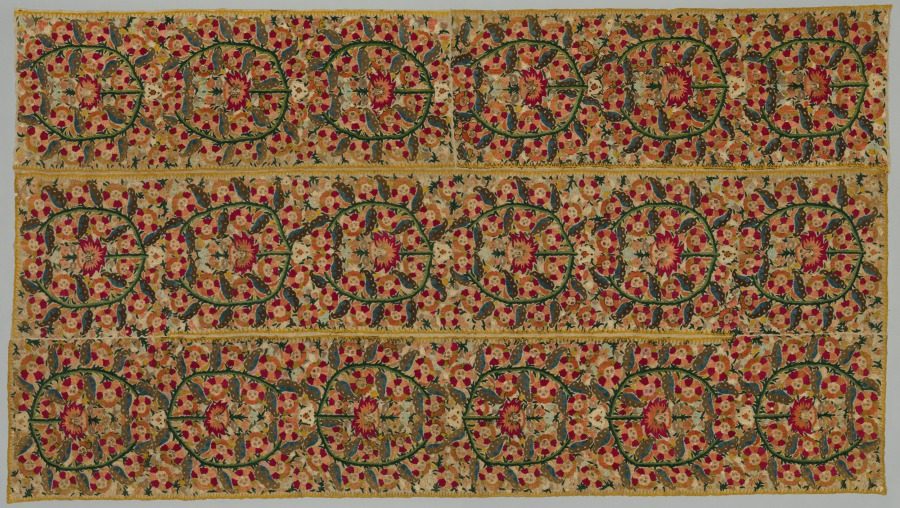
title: Four Borders from a Bedspread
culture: Greece, Epirus, Yaninna, 18th century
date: 1700s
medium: embroidery: silk on linen tabby ground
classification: Embroidery